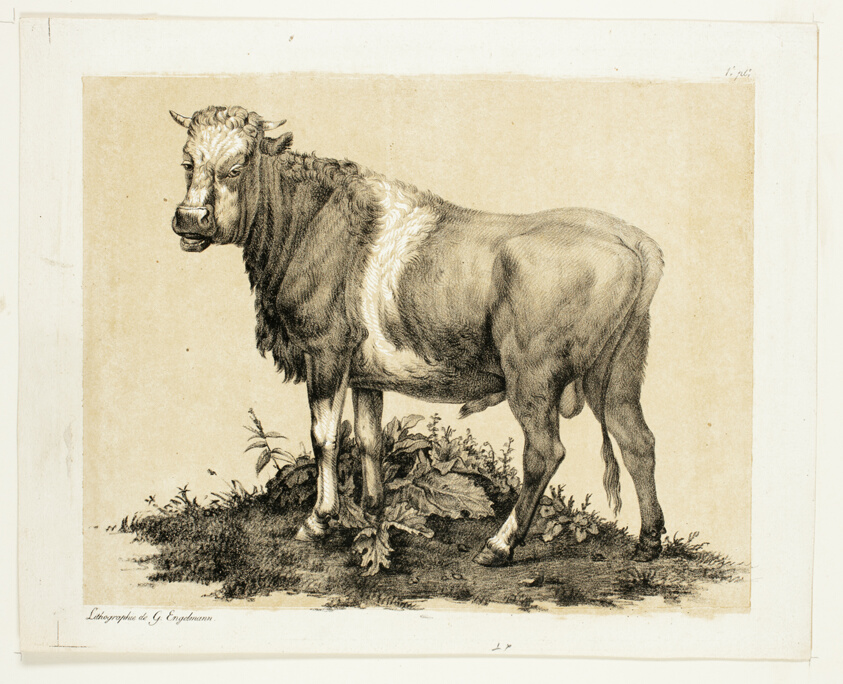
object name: Print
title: The Bull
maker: Gottfried Engelmann (French, 1788-1839); after Paulus Potter (Dutch, 1625-1654); published by Gottfried Engelmann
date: October 1815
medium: Lithograph from two stones, one black and one fawn, on ivory wove paper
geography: France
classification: lithograph; print; prints and drawing